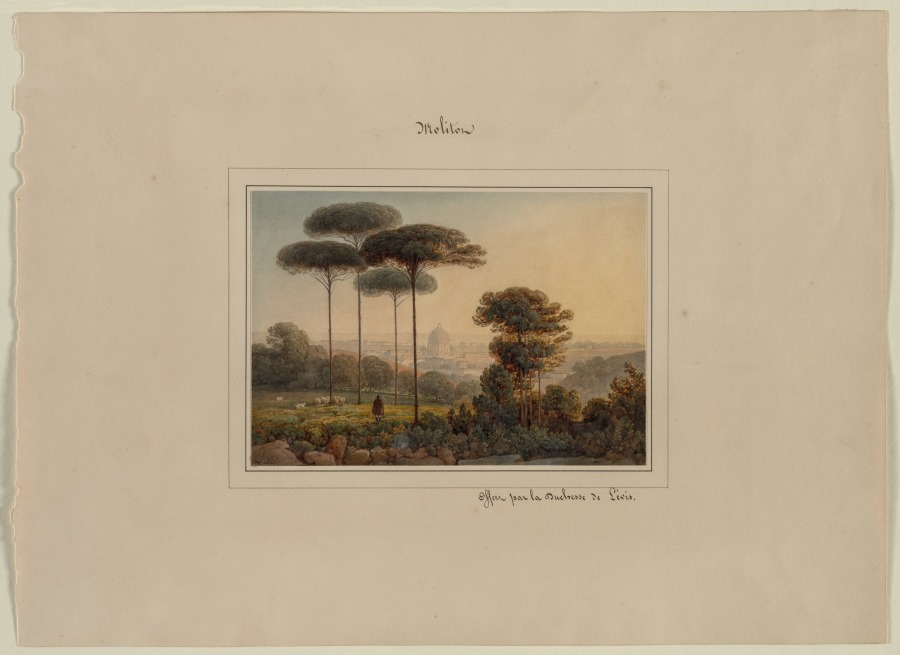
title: View of the Basilica of St. Peter from the West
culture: Austria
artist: Joseph Molitor (Austrian, after 1837)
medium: watercolor with traces of graphite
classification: Drawing